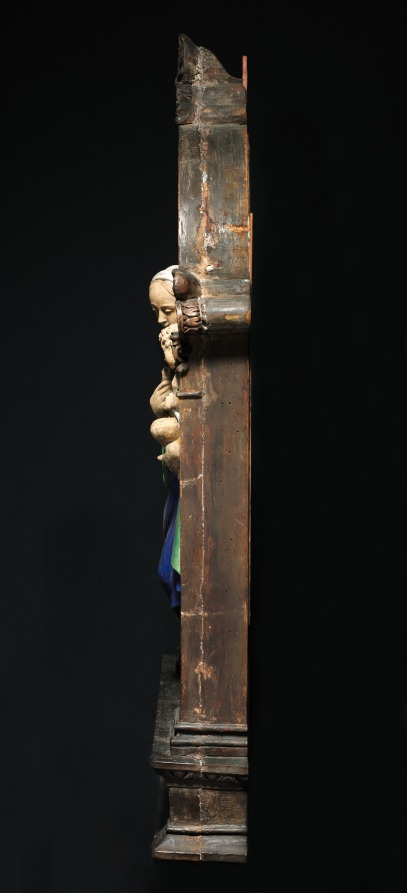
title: Virgin and Child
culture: Italy, late 15th-early 16th Century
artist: Benedetto Buglioni (Italian, 1461–1521)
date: 1500–1510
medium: glazed terracotta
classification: Sculpture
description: This small devotional object differs stylistically from Buglioni's Madonna and Child Enthroned with Saints Francis and Anthony Abbot (1921.1180), also in the museum's collection. In contrast to the other work, the faces of the Madonna and Child are significantly less expressive, and the passages of exposed skin have been left unglazed. The Madonna holds a nude Christ on her left arm and wears a mantle of blue with green lining and a maroon tunic with a yellow collar and cuffs. Her bright yellow shoes and the purple of her tunic are characteristic of Buglioni's color scheme and can also be seen in the other work. The tabernacle frame is probably contemporary to the figures, although it may not have been created specifically for this altarpiece. Buglioni likely worked in the studio of Andrea della Robbia, where he would have studied the family's techniques for glazing terracotta. The frame is classically inspired, with Corinthian capitals and Buglioni's characteristic egg and dart moldings. The facial type in this Madonna and Child recalls Buglioni's Madonna delle Grazie in Florence's Palazzo Frescobaldi, and because of this similarity, the scholar Allan Marquand attributed the Cleveland Madonna and Child to Buglioni in 1921, although this attribution has since been questioned.